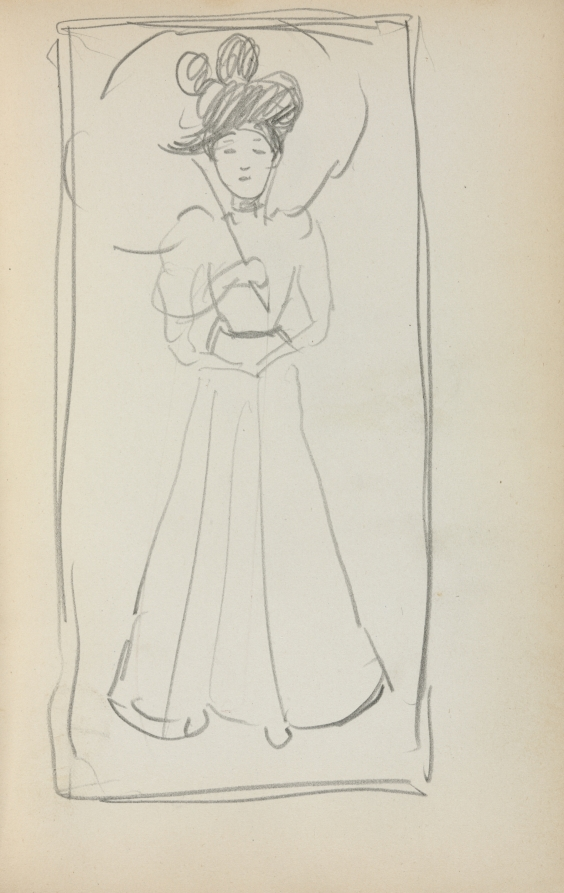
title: Italian Sketchbook: Standing woman with parasol (page 233)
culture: America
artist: Maurice Prendergast (American, born Newfoundland [now Canada], 1858–1924)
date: 1898–1899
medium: pencil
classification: Bound Volume